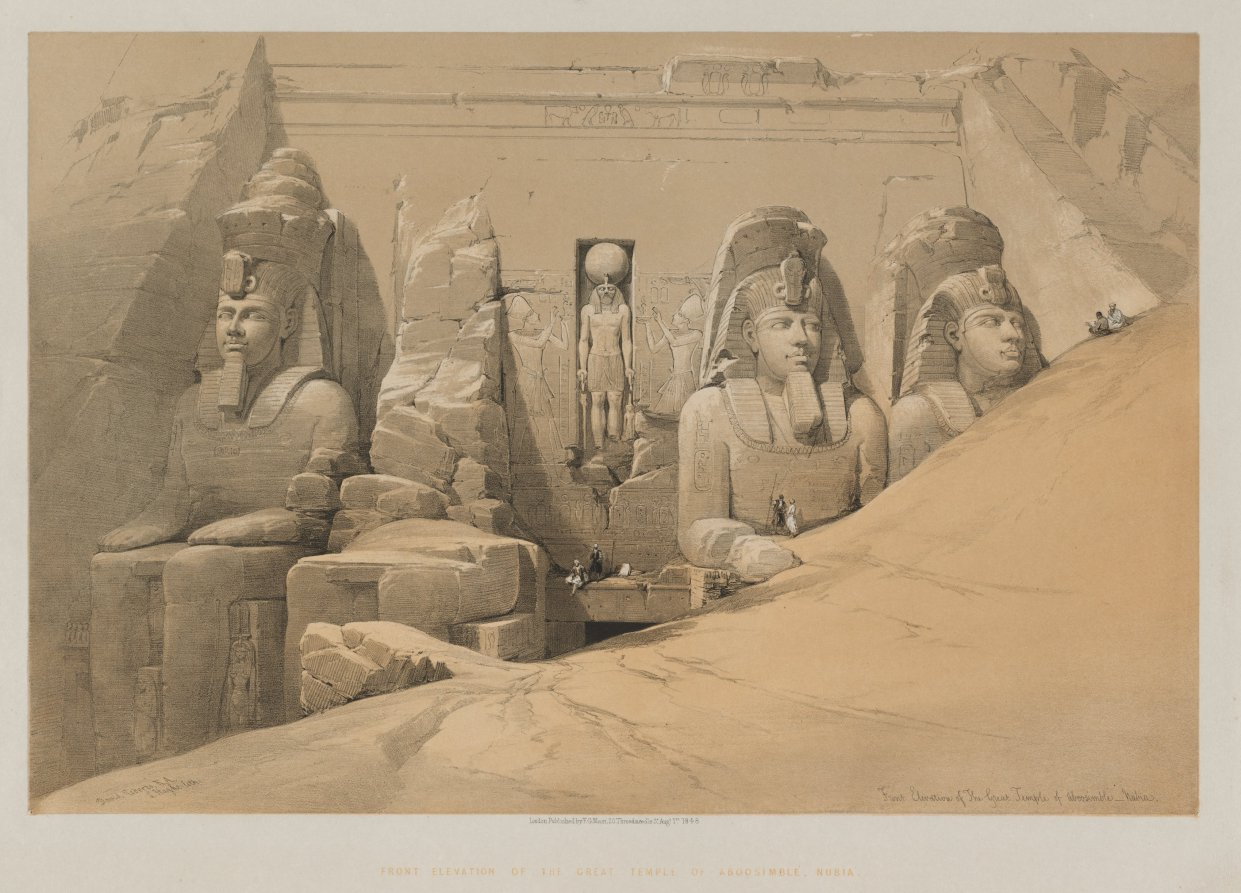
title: Egypt and Nubia, Volume II: Front Elevation of the Great Temple of Aboo Simbel, Nubia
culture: England, 19th century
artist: Louis Haghe (British, 1806–1885)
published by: F. G. Moon (British, 1797–1871)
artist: after David Roberts (Scottish, 1796–1864)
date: 1848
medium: color lithograph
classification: Print